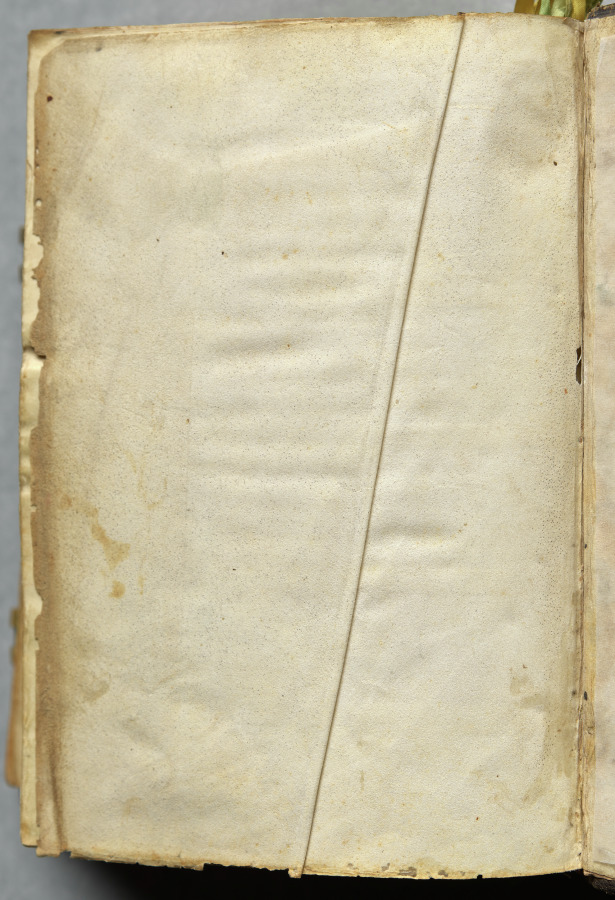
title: Hours of Charles the Noble, King of Navarre (1361-1425), Blank Fly Leaf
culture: France, Paris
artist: Master of the Brussels Initials and Associates (French)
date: c. 1405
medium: ink, tempera, and gold on vellum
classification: Bound Volume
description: This precious book was highly prized by its owner, Charles III, King of Navarre, a French-born prince whose coat of arms is painted on 20 folios. Charles visited Paris on numerous occasions and likely acquired this volume there in 1404. Paris was the center of the European book trade at the time and attracted illuminators from many parts of Europe. This manuscript represents one of the most remarkable fusions of French and Italian taste in book illumination. Though conforming to Parisian standards, most of the book’s major miniatures are the work of the Brussels Initials Master, an Italian illuminator who previously worked in Bologna and Padua.